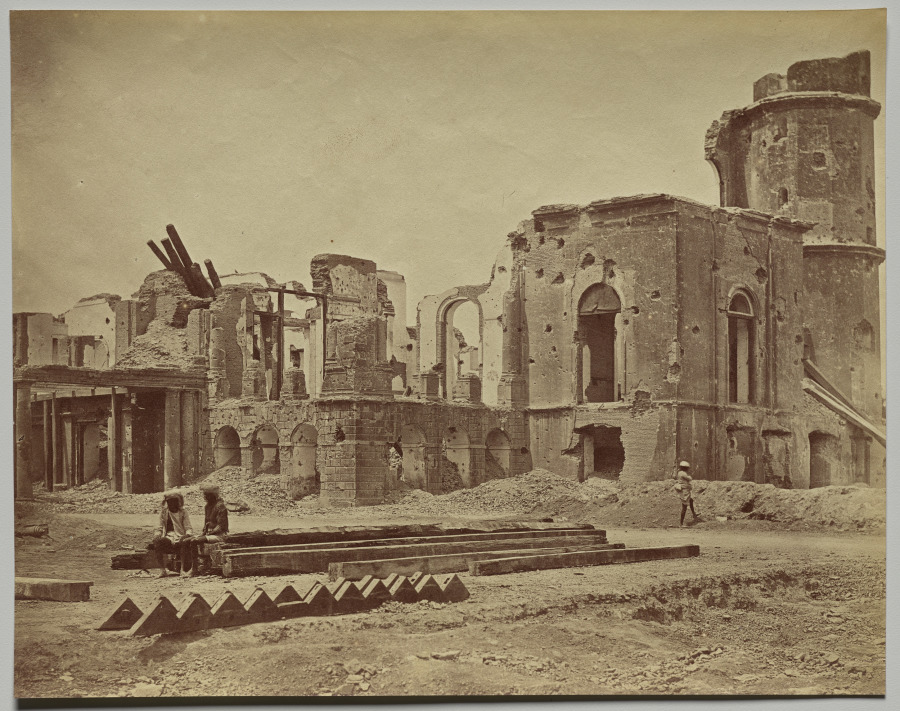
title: The Residency From the Front, Showing the Room in Which Sir Henry Lawrence was Killed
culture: England, 19th century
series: Lucknow After the Siege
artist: Felice A. Beato (British, 1832–1909)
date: 1858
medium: albumen print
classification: Photograph